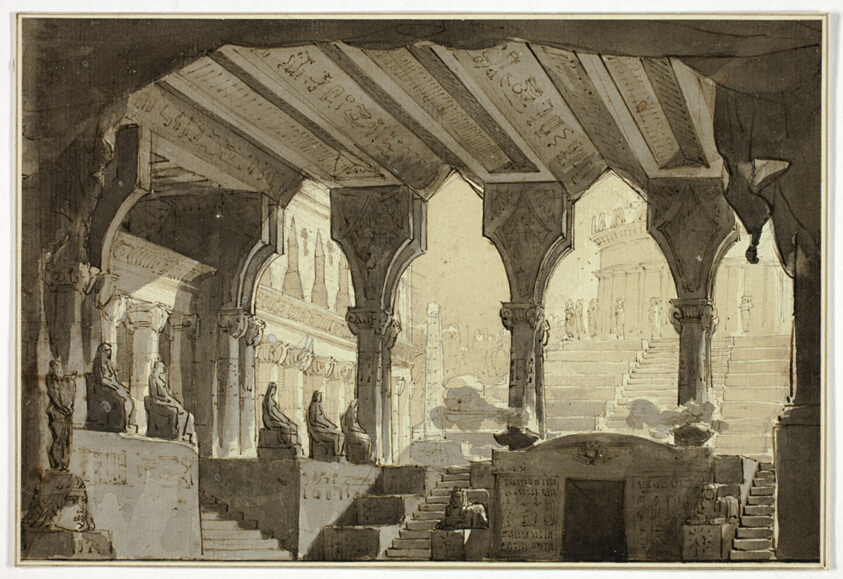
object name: Drawing and Watercolor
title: Stage Design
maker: Attributed to Louis Jean Desprez; French, 1743-1804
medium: Pen and brown ink with brush and gray and brown wash, over graphite, on ivory laid paper, laid down on buff wove paper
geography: France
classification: drawings (visual works); prints and drawing